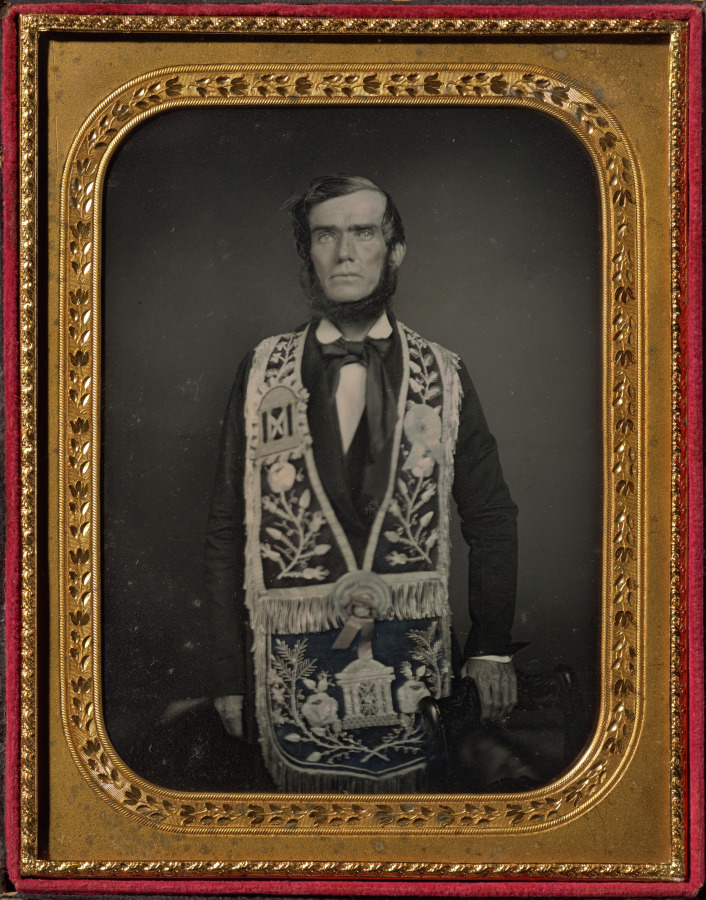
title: Secretary for a Lodge of a Temperance Organization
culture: America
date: c. 1854–55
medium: daguerreotype, half-plate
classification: Photograph